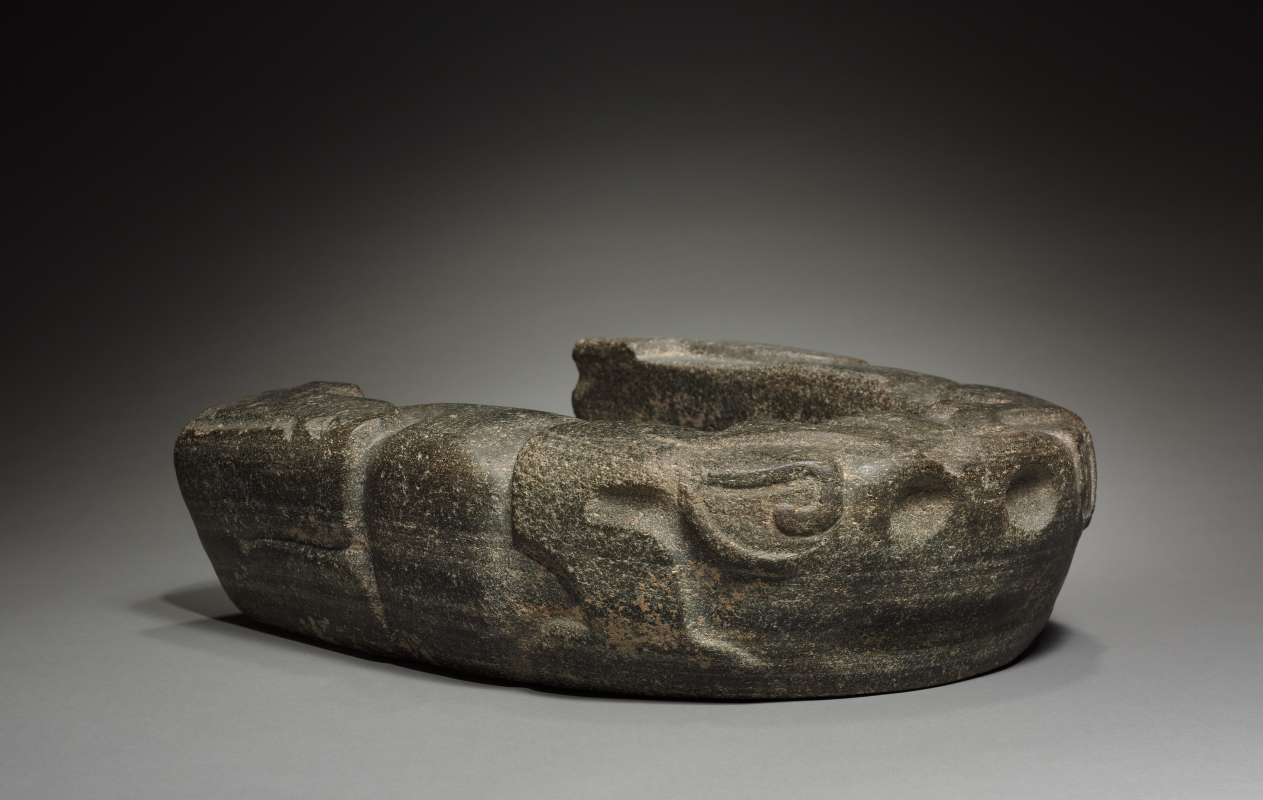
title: Unfinished Yoke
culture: Mexico, Central Veracruz, Classsic Veracruz style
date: 600–900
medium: gray stone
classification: Sculpture